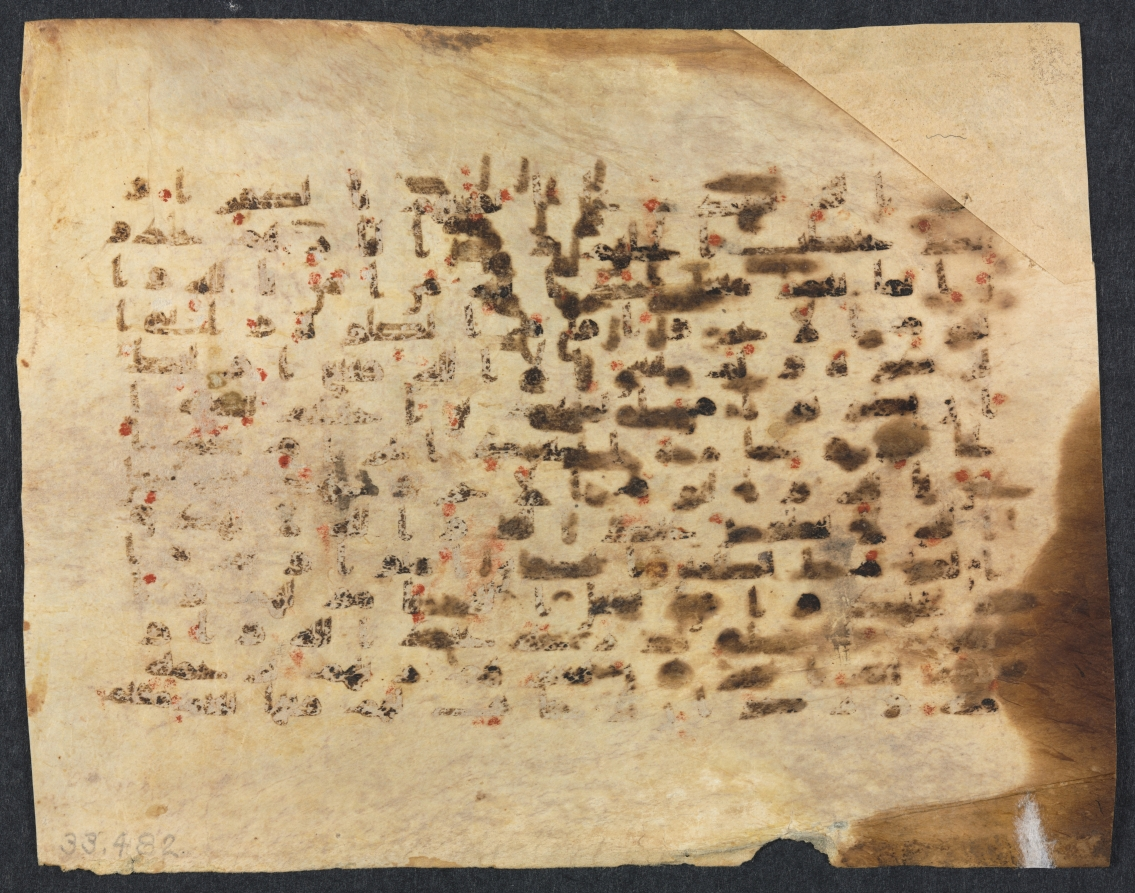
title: Qur'an Manuscript Folio (verso)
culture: Egypt?, Abbasid Period, 9th century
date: 800s-900s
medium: ink, gold, and color on parchment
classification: Drawing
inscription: Kufi Script. 14 Lines to a Page. Recto: Qur'an Sura al-Tawba 9: part 12 - part 17. Verso: Text has almost completely disappeared. TM June 03, 2009